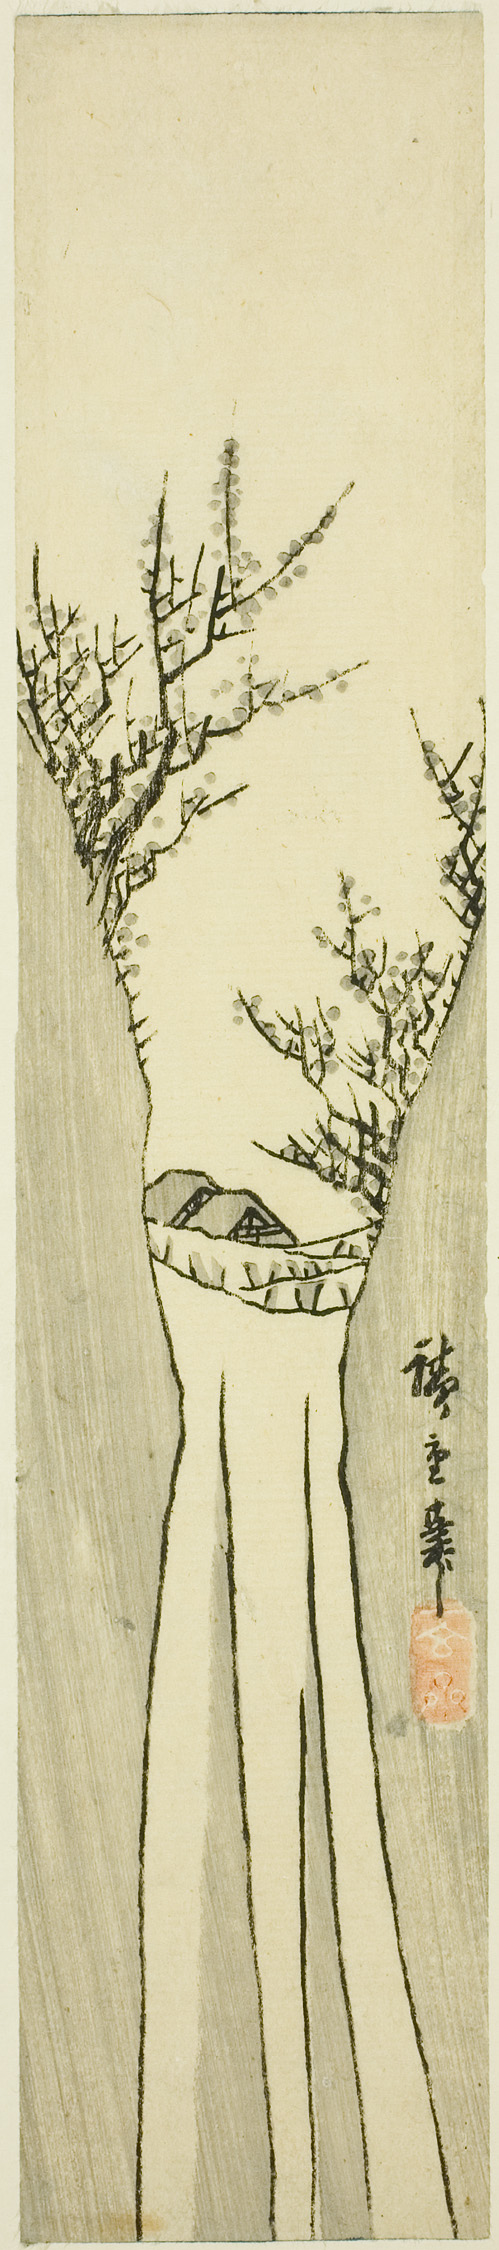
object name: Print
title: Landscape with Waterfall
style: Japanese (culture or style)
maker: Utagawa Hiroshige (Japanese, 1797-1858)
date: 18th century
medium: Woodblock print; hashira-e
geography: Japan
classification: woodblock print; print; asian art; woodblock